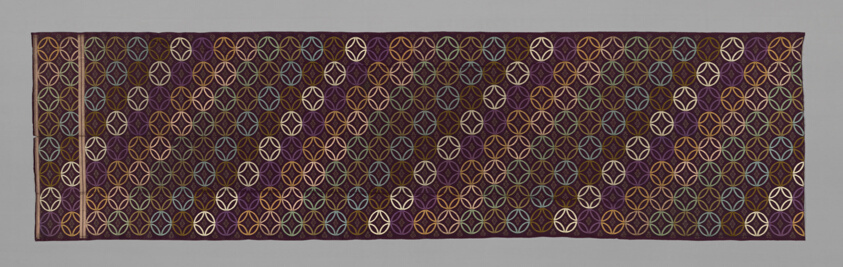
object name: Textile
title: Fragment (From Obi)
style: Japanism, meiji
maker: Japan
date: Meiji period (1868–1912), 1875/1900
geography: Japan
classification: textile; weaving; obi (sash)